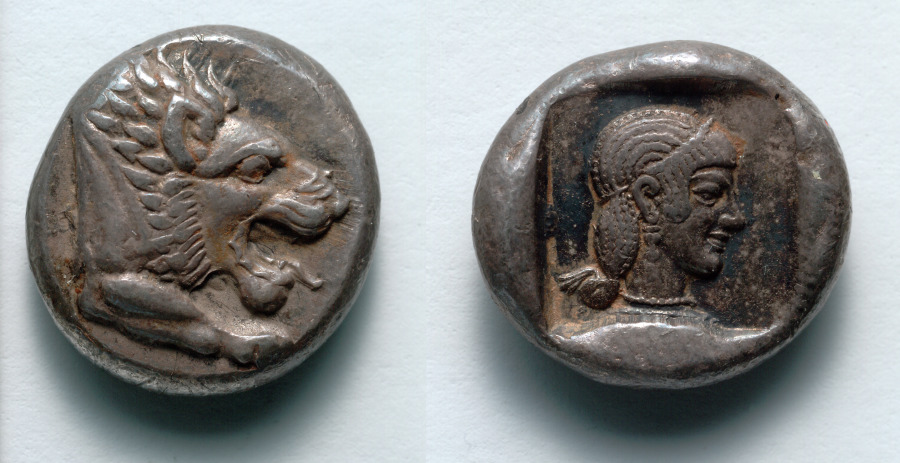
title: Drachm: Forepart of Lion (obverse); Head of Aphrodite (reverse)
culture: Greek, minted at Knidos (Karia)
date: 465–449 BCE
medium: silver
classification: Coins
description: The lion, king of the beasts and an animal associated with regal and heroic power, featured prominently on the coinage of many ancient Greek city-states. Artists placed the lion in a variety of poses, sometimes including the whole body, at other times the foreparts or just the head. Although it may once have roamed nearby, for many Greeks the lion was a monster nearly as exotic as the Chimaera, of which it formed a part, together with a goat head and snake-headed tail.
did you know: The forepart of a lion on Knidian coins is thought to represent Apollo.